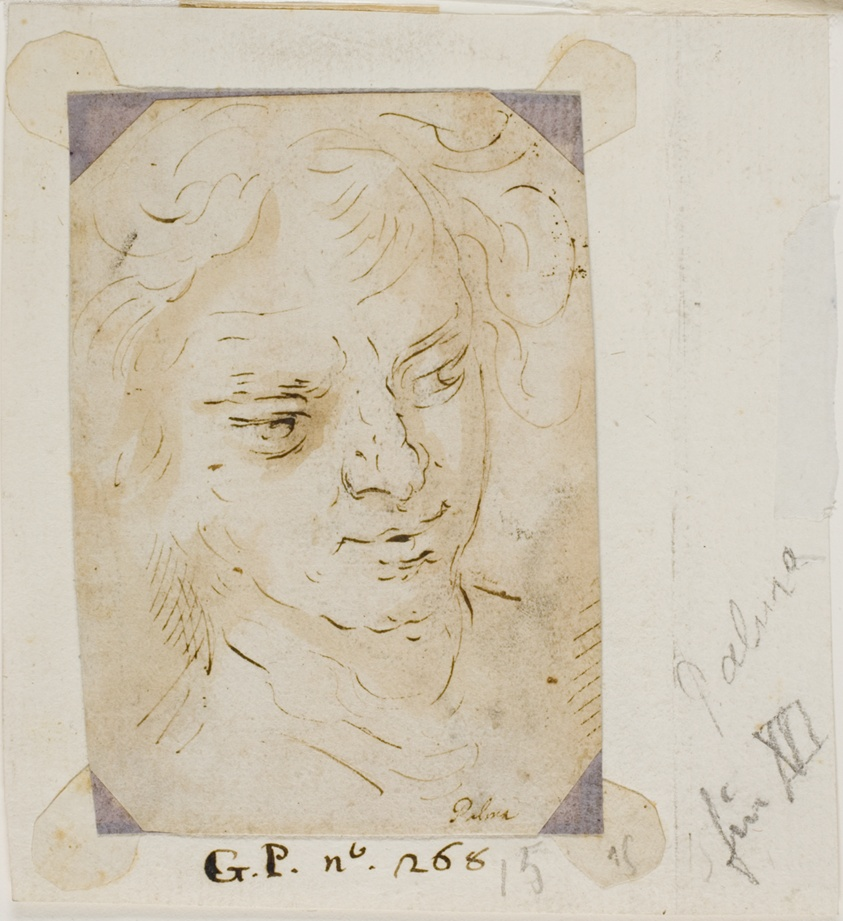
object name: Drawing and Watercolor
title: Head of a Man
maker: Jacopo Negretti, called Palma il Giovane; Italian, c. 1548-1628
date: 1600/11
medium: Pen and brown ink, with brush and brown wash, over black chalk underdrawing on ivory laid paper, laid down on gray laid paper, tipped onto cream laid paper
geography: Italy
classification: pen and ink drawings; drawings (visual works); prints and drawing